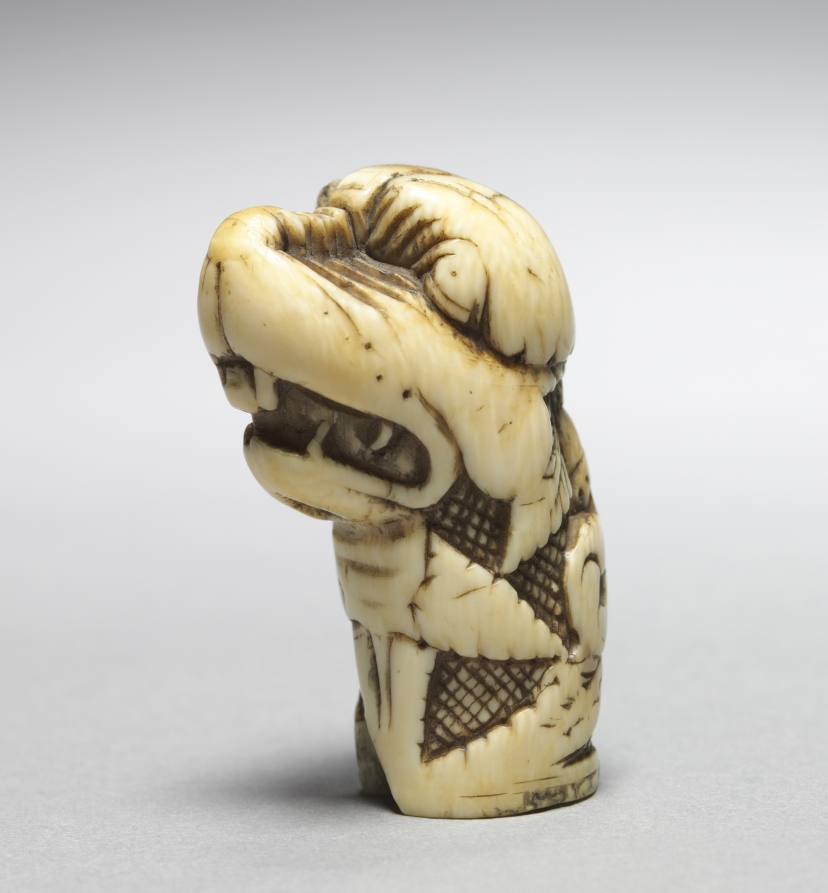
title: Dragon's Head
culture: Anglo-Norman?, Romanesque period, 12th century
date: 1100–1150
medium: walrus ivory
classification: Ivory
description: This exceedingly rare medieval carving, which recalls the more monumental carvings on Viking ship prows, may have been a finial for a diagonal member of a folding chair. The character of the head, the stylized acanthus leaves, and the foliage-spouting mask on the neck are characteristic of north European and Anglo-Norman Romanesque styles.